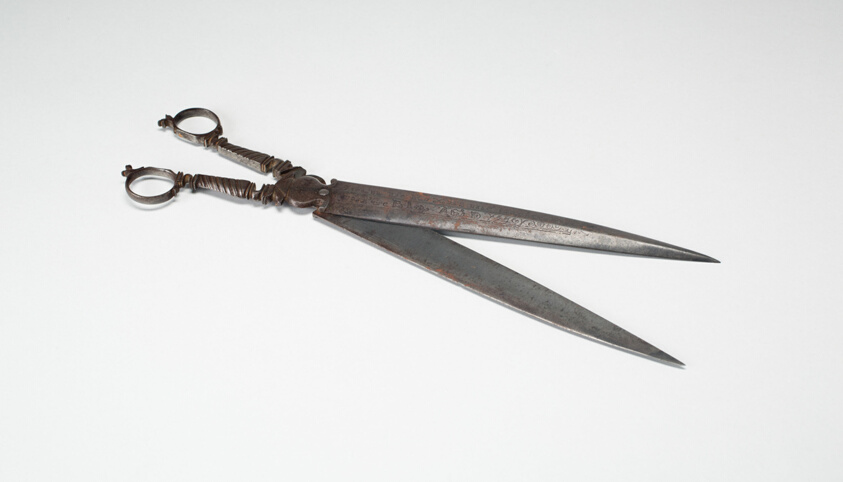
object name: Metalwork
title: Shears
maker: Spain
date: 1734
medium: Steel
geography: Spain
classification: tool; european decorative arts; metalwork